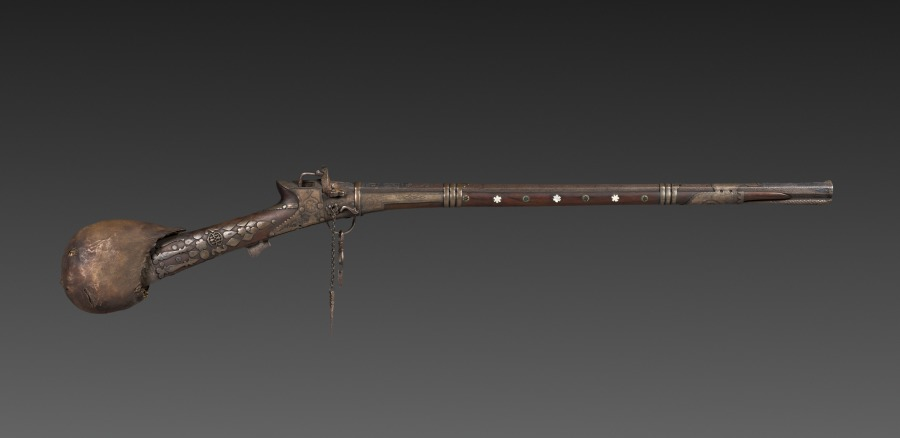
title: Matchlock Musket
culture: Turkey, Ottoman period (1299–1922)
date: c. 1750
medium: Wood, steel, brass, mother-of-pearl inlay, and leather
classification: Arms and Armor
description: Collectively, the Safavid, Mughal, and Ottoman empires are known as the Gunpowder Empires. Particularly from the 1500–1700s, they were among the strongest economic, cultural, and militaristic powers. Each trained and equipped their armies with the latest gunpowder firearms, particularly cannons and muskets. While used in battle, muskets were also used for leisure activities, particularly hunting. The decoration on this musket suggests it was a courtly item, fitted with a leather pad to protect the shooter from the force of the explosion after firing.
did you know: A matchlock musket was loaded from the muzzle end with a scouring stick kept in a sleeve on the underside of the barrel.